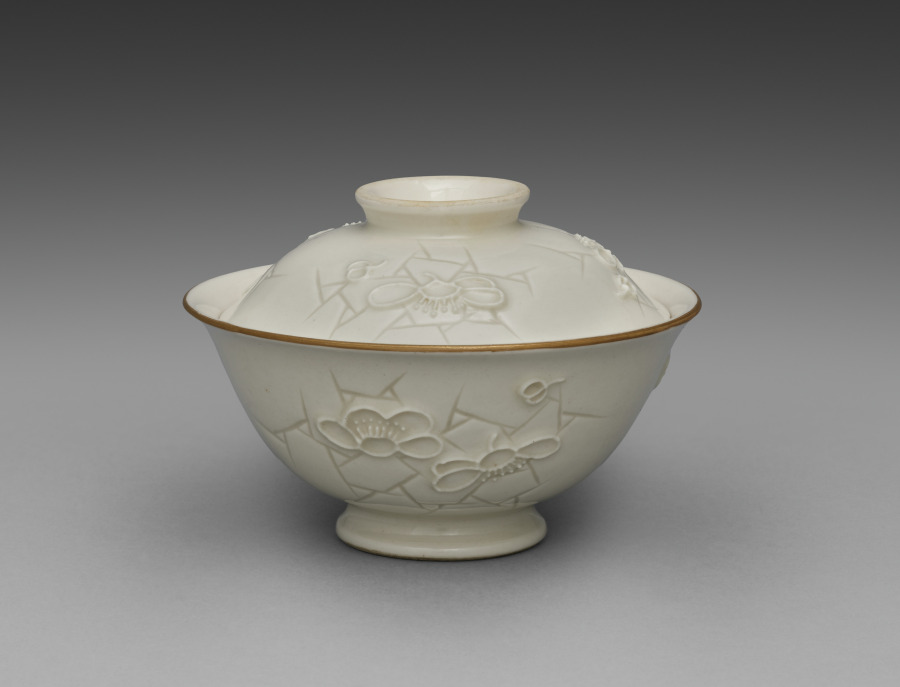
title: Covered Bowl from Dining Set with Plum Blossoms and Cracked-Ice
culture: Japan, Meiji period (1868–1912)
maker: Seifū Yohei II (Japanese, 1844–1878)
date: c. 1875–78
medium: Porcelain with molded designs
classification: Ceramic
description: Each item in this set has a delicate low-relief design of flowering plum branches over scattered, intersecting lines meant to resemble the cracked-ice surface of a frozen body of water and is signed on the base in gold pigment. While Yohei II produced many fine works in underglaze blue, like those produced by Kiyomizu Shichibei, he also made works in quite different styles later in his career, from the early 1870 s. In 1873, he was appointed purveyor to the Industrial Center of Kyoto Prefecture, a designation associated with Kyoto’s efforts to reach an international market through the port of Kobe; and from 1875 until his death, he was involved in national-level projects to present Japanese ceramics across the world. It was during this period that Yohei III was apprenticed to Yohei II, and it has been suggested that this set may in fact be an early example of Yohei III’s work, which he signed with his teacher’s name. Decorated with flowers resembling Japanese textile motifs, the set calls to mind the design of Yohei II’s pair of vases with plum blossoms in the Victoria and Albert Museum. Here, the elaborate trees created for a formal public exhibition setting have been translated into the approachable blossoms of the genteel domestic environment. While the designs are consistent across the pieces, each raised flower petal and pistil and each incised line in the ice was done by hand, so the cups, bowls, and dishes are similar yet unique. The bottoms of two boxes once identified the set’s owner, but the information has been deliberately obscured with black ink. However, inscriptions still visible appear to indicate two occasions, once at the end of July 1886 , and once again in June 1916 , when parts of the set were requested from Hokura in Niigata Prefecture. The location corresponds to a neighborhood in the present-day city of Jōetsu. The surname Tsuji 辻 also appears on a paper tag affixed to one of the box cloths. Future research may possibly reveal more about their provenance. A vase by Yohei III in a private collection combines the formal grandeur of the Yohei II vases in the Victoria and Albert Museum with the gentler design of this dining set, placing flowering plum trees against soft, scalloped-edge clouds resembling those in golden screens.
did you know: The dining wares have a creamy white coloration that the four boxes containing them identify as Korean in style.